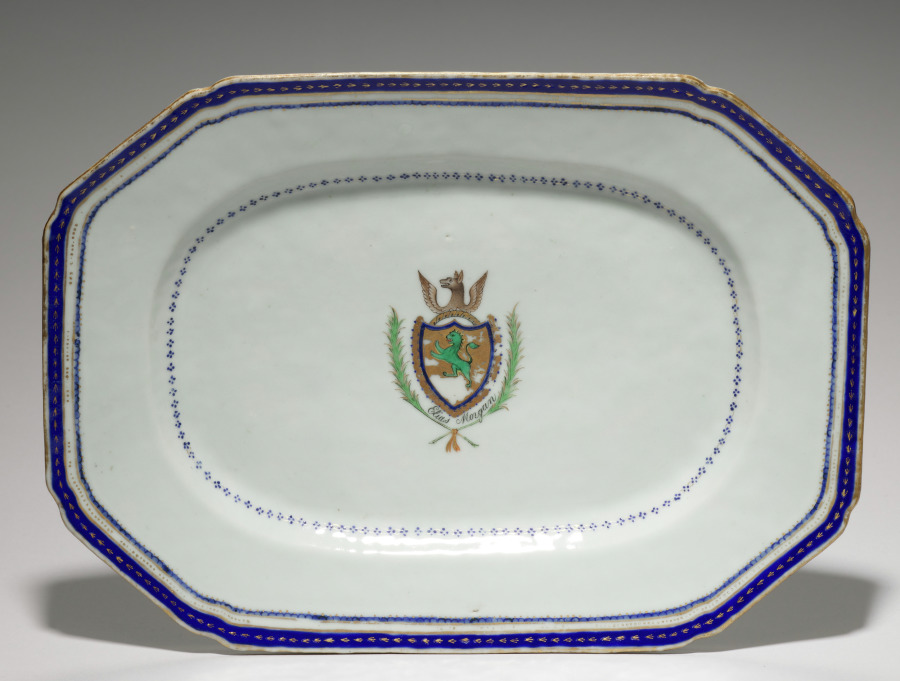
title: Small Platter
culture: China, Chinese Export -- American Market, early 19th century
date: c. 1800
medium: porcelain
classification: Ceramic